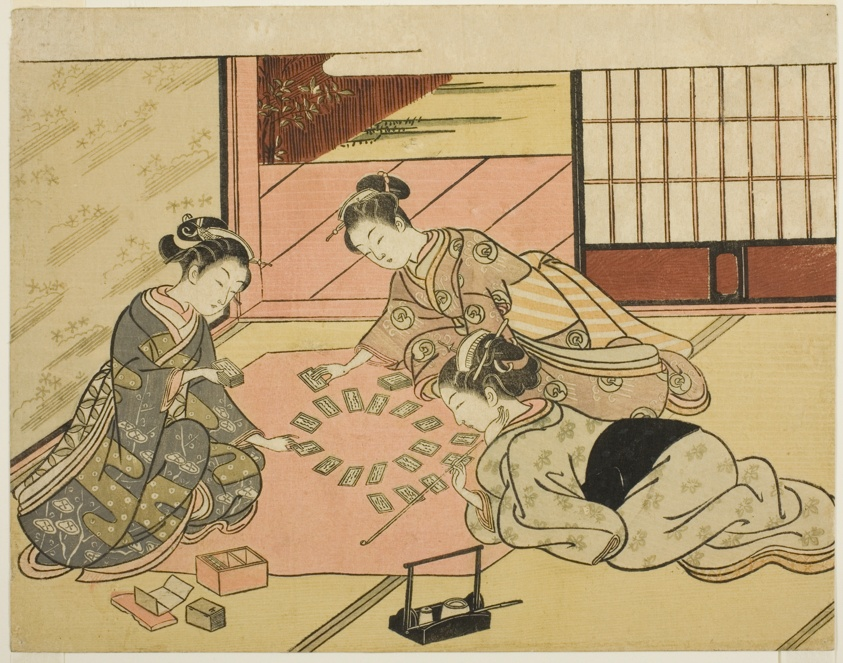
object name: Print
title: Young Women Playing Poem Cards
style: Japanese (culture or style)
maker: Suzuki Harunobu 鈴木 春信; Japanese, 1725 (?)-1770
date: c. 1766/67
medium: Color woodblock print; chuban yoko-e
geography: Japan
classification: woodblock print; print; asian art